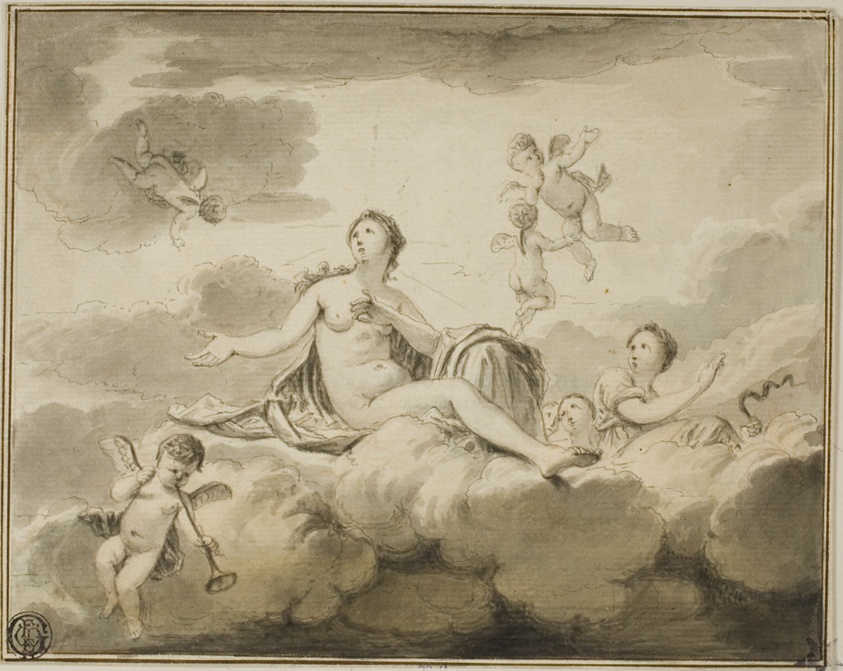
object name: Drawing and Watercolor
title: Ceiling Design: Truth Triumphant, with Prudence and Other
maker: Unknown artist (18th century)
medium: Pen and black ink, with brush and gray wash and touches of blue and yellow wash, over red chalk, on cream laid paper, tipped on cream wove paper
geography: France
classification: ink or chalk wash; pen and ink drawings; paper; drawings (visual works); prints and drawing